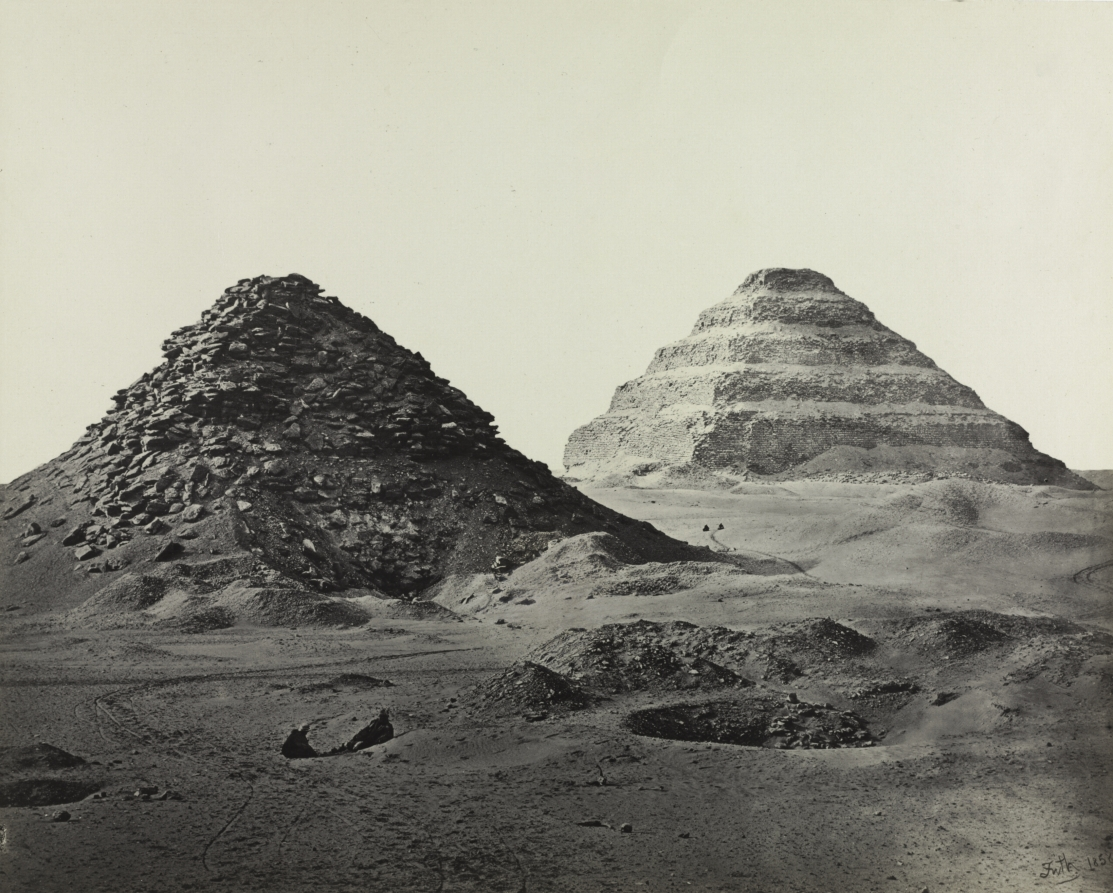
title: The Pyramids of Saqqara, from the Northeast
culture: England, 19th century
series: Egypt, Sinai and Jerusalem: A Series of Twenty Photographic Views, with Descriptions by Mrs. Poole and Reginald Stuart Poole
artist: Francis Frith (British, 1822–1898)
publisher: William Mackenzie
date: 1858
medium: albumen print from wet collodion negative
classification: Photograph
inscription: Written in negative: "Frith 1858"; in pencil on verso: "137 / 206"; "7126.7"; "CED7051 [? this has been erased]"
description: Frith was the first photographer in Egypt to successfully use the wet collodion process, introduced in 1851. Its glass plate negatives yielded sharper, more detailed images than paper ones. He even created mammoth plate prints, as this size is called, which required equally large glass plate negatives. Pursuing the process’s exacting chemistry in Egypt’s scorching sunlight was trying. Frith sometimes sought refuge in tombs for the cool air and darkness to process his plates. “Pushing myself backwards upon my hands and knees, into a damp slimy rock-tomb . . . I prepared my pictures by candlelight in one of the interior chambers. . . . The floor was covered . . . with an impalpable ill flavored dust, which rose in clouds as we moved; from the roof were suspended groups of fetid bats.”